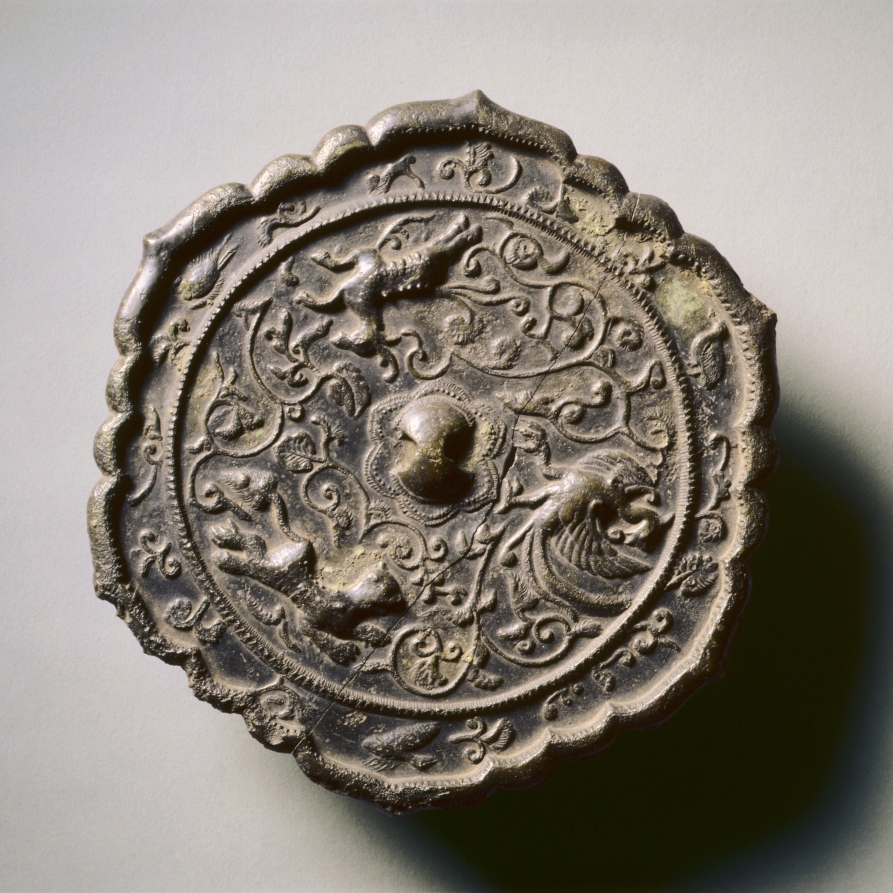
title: Hexafoil Mirror with Floral Interlaces, a Phoenix, and Running Animals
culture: China, Tang dynasty (618-907)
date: early 600s-early 900s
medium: bronze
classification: Metalwork